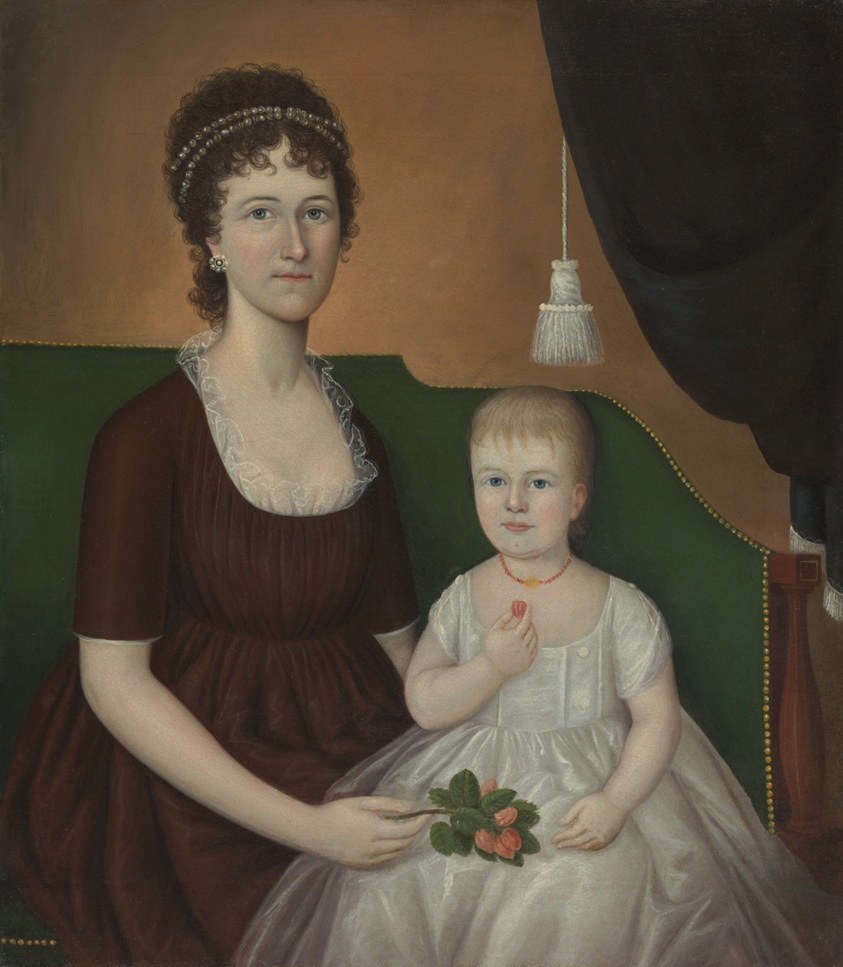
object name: Painting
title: Elizabeth Grant Bankson Beatty (Mrs. James Beatty) and Her Daughter Susan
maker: Joshua Johnson (American, c. 1763–after 1825)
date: c. 1805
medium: Oil on canvas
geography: Baltimore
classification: painting; american arts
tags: fashion, children, families, portraits, people